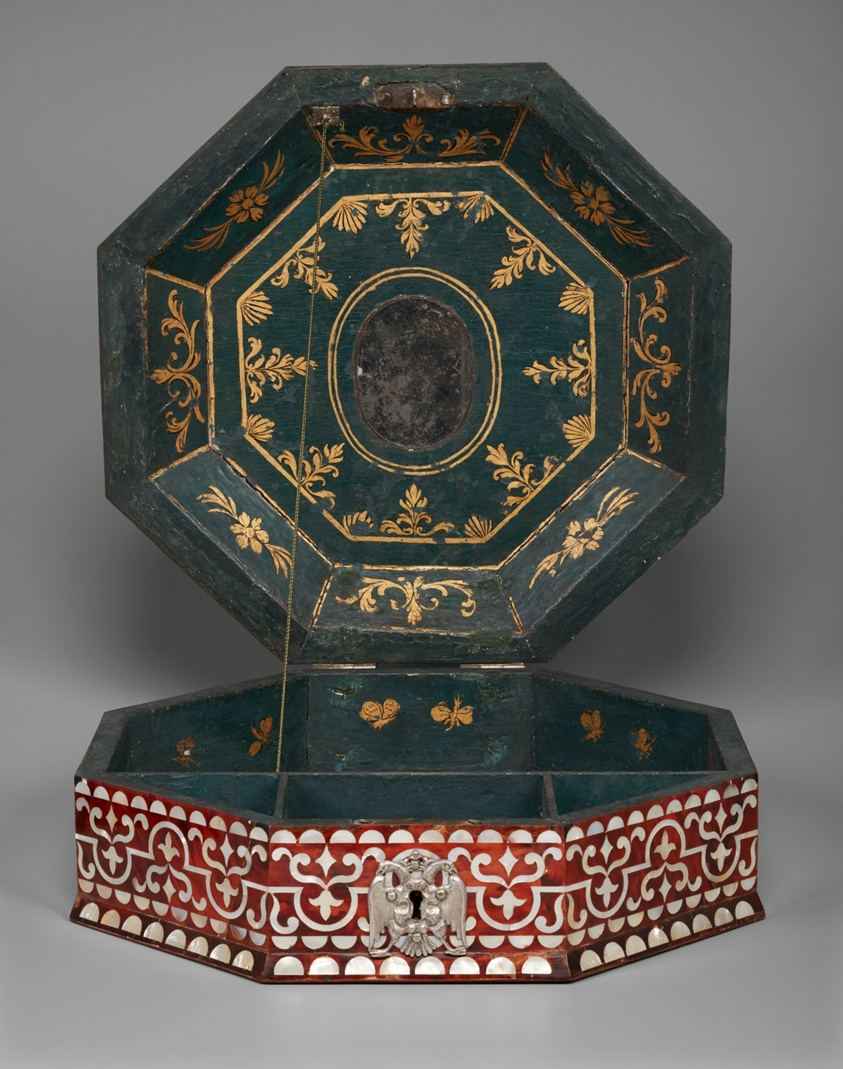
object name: Decorative Arts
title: Coffer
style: 18th Century, Baroque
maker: Peruvian; Probably Lima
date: c. 1750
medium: Wood, tortoiseshell, mother-of-pearl, silver, glass, and paint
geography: Lima department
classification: box; inlay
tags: box, coffer